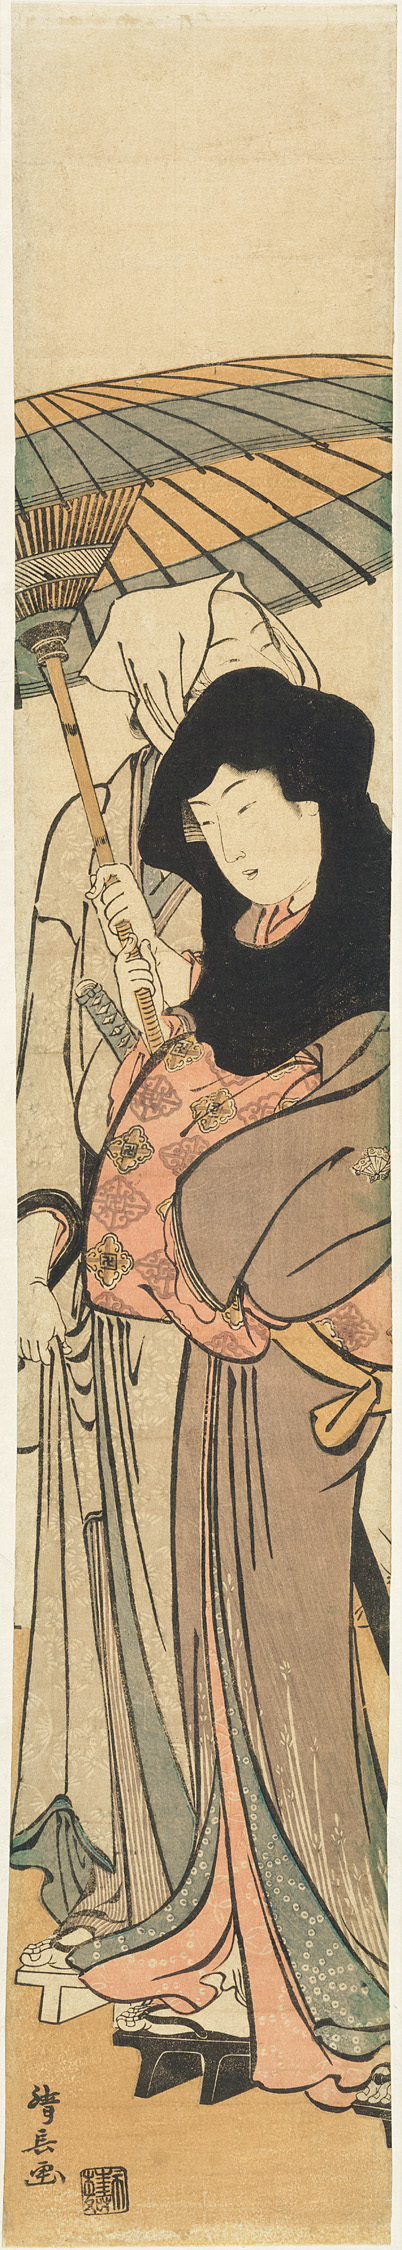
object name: Print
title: Ochiyo and Hanbei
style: Japanese (culture or style)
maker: Torii Kiyonaga (Japanese, 1752-1815)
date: c. 1784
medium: Color woodblock print; hashira-e, nishiki-e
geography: Japan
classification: woodblock print; print; asian art